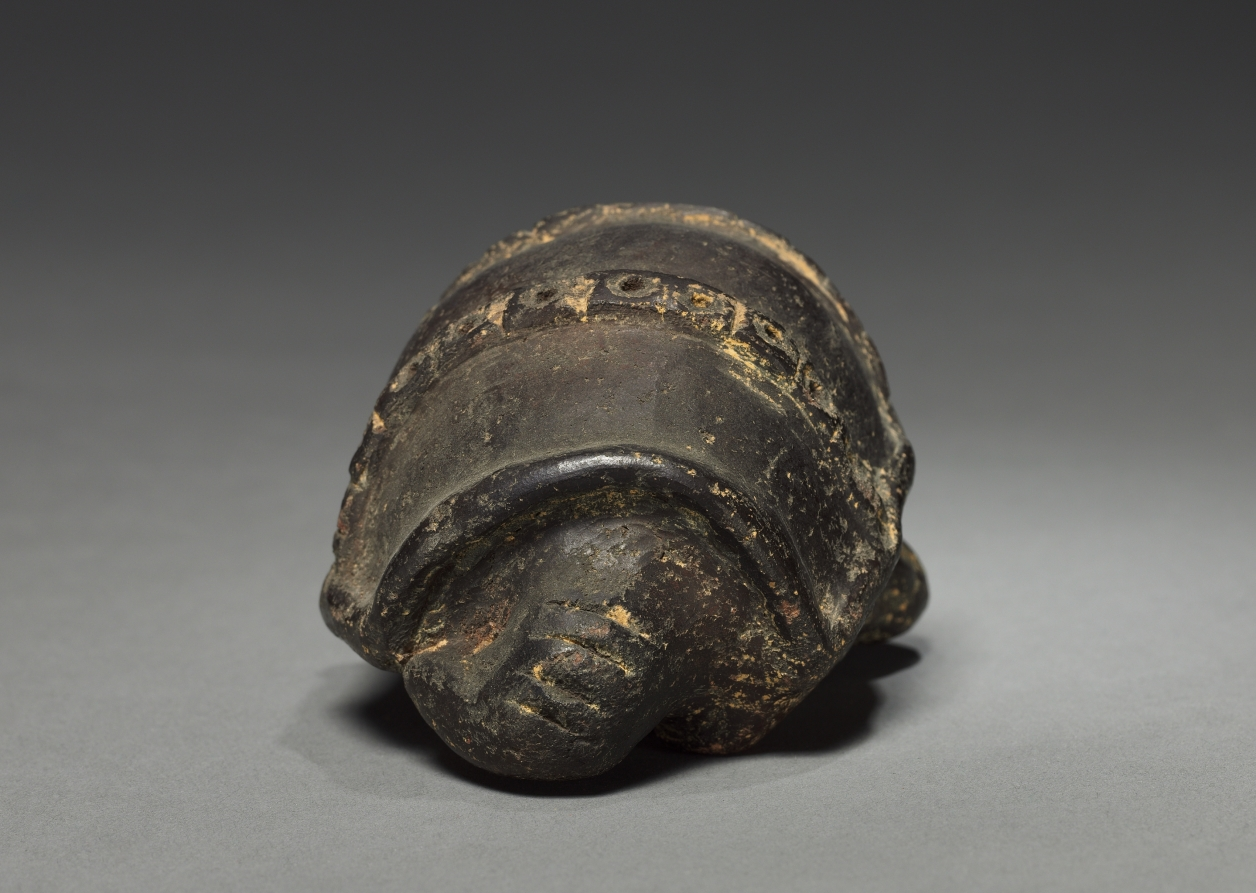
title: Armadillo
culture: Colombia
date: before 1921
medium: pottery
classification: Ceramic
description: Rattles that combine ravens, humans, and frogs are among the best known but least understood of the Northwest Coast object types. They clearly have mythic import and may have originated as shamans’ implements. But historically chiefs used them during secular parts of winter dances.